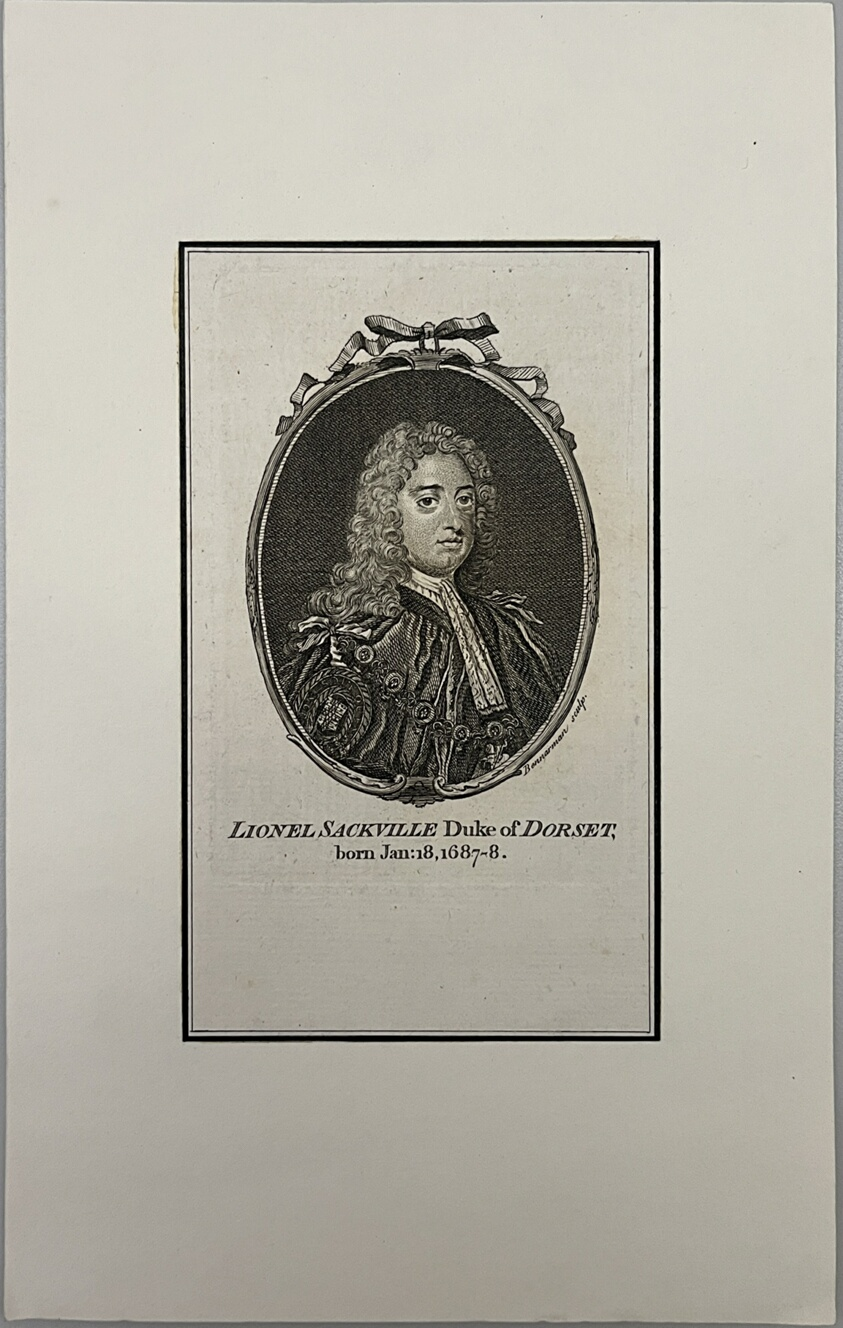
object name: Print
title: Lionel Sackville, Duke of Dorset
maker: Alexander Bannerman (English, c. 1730-1780); after Godfrey Kneller (German, 1646 - 1723)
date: 1757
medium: Etching on paper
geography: United Kingdom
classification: reproduction; print; prints and drawing